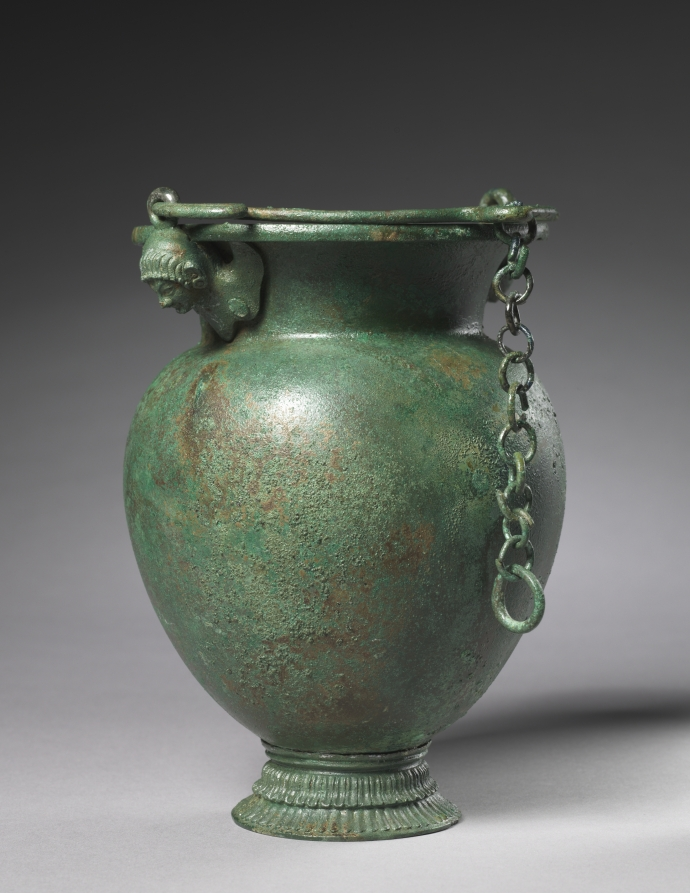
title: Situla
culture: Etruscan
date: c. 525–450 BCE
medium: bronze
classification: Metalwork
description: Known as a situla, or bucket, this bronze vessel features an ovoid body with a flaring neck. The separately made foot is quite elaborate and unusually shaped for this type of vessel. More typical is the handle, designed to swing upward from its two attachments, each finely cast in the form of a frontal siren with earrings and very small, simplified wings.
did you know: The handle includes a loop with attached chain, perhaps meant for hanging.